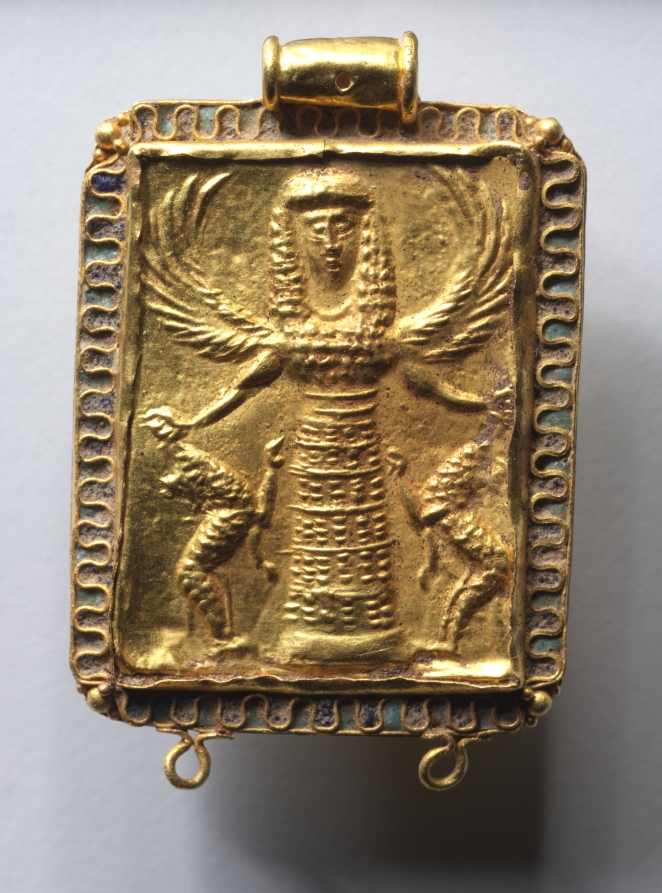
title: Daedalic Pendant with Potnia Theron (Mistress of Animals)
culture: Eastern Greece, Rhodian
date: 650–600 BCE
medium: gold and glass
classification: Metalwork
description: This pendant shows the goddess Potnia Theron, the “mistress of the animals,” a deity sometimes associated with the Greek goddess Artemis. The goddess stands in a frontal pose with upswept wings, one curving above each shoulder. Each of her fists closes around the leash of a rearing feline. This piece is one of two nearly identical pendants in the collection (1999.88 and 2001.157) that were probably originally from the same necklace.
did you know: The small loops at the bottom of the pendants probably held chains attached to pomegranate-shaped beads.